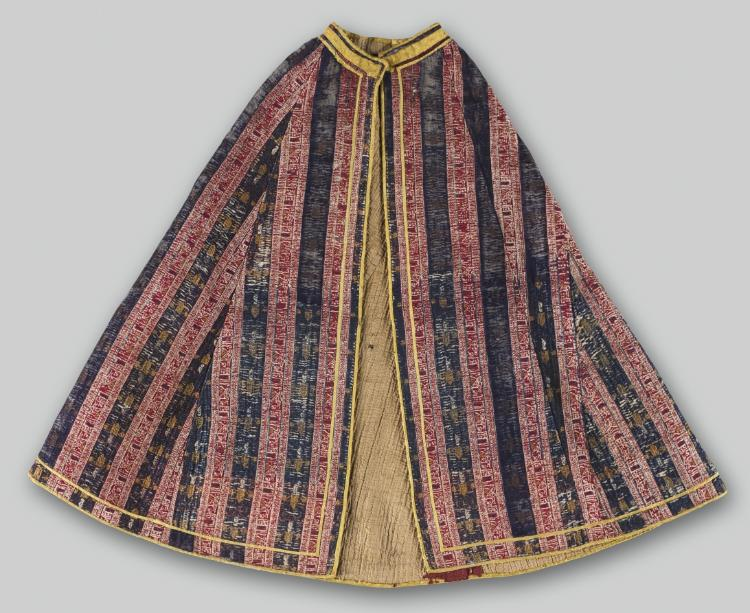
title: Mantle for a statue of the Virgin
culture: Spain, Granada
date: late 1400s–1500s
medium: Silk: lampas weave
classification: Textile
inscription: on red ground is Naskhi inscription "Glory to our Lord, the Sultan" in white.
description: A striped silk textile, probably made for use in the Islamic Alhambra palatine complex, was turned into a mantle for a statue of the Virgin Mary. On the crimson stripes the salutation that occurs as ornamental text throughout the Alhambra, Glory to our Lord the Sultan, repeats in Arabic script.